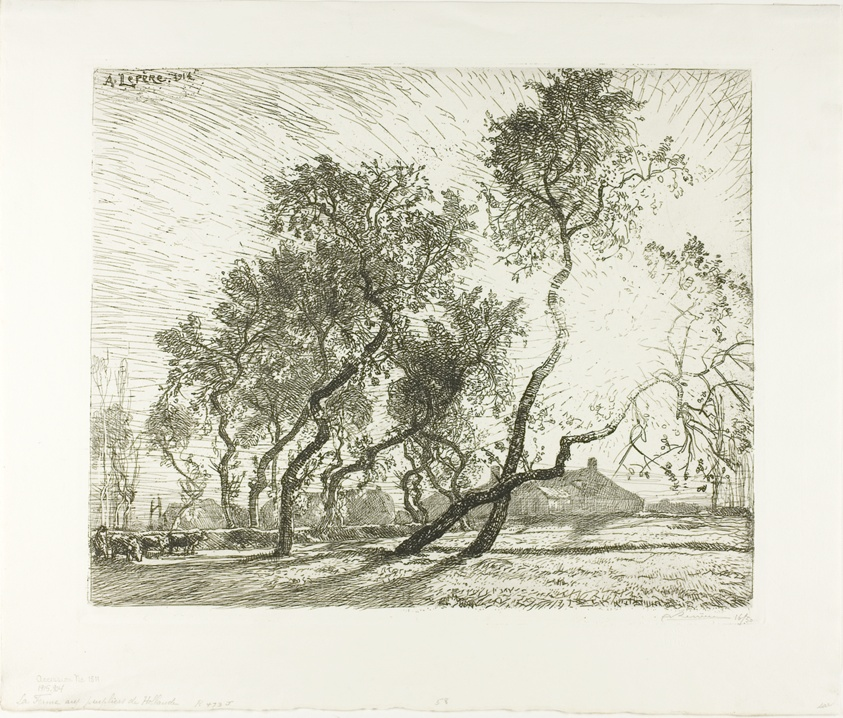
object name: Print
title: Farm with Dutch Poplars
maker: Louis Auguste Lepère (French, 1849-1918)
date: 1914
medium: Etching on cream wove paper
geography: France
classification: etching; print; prints and drawing